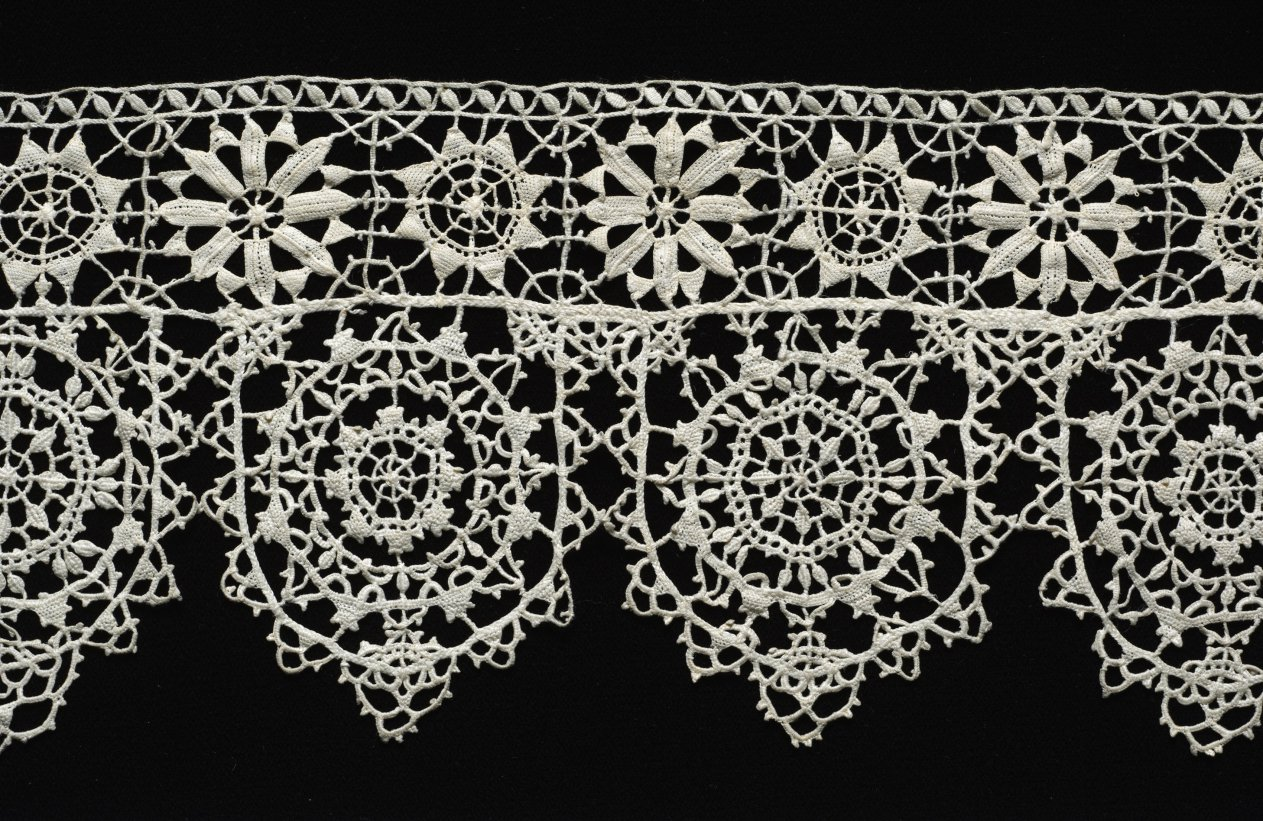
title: Lace Fragment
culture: Italy, Genoa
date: 1550–99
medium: Needle lace (reticella) insertion and edging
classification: Lace